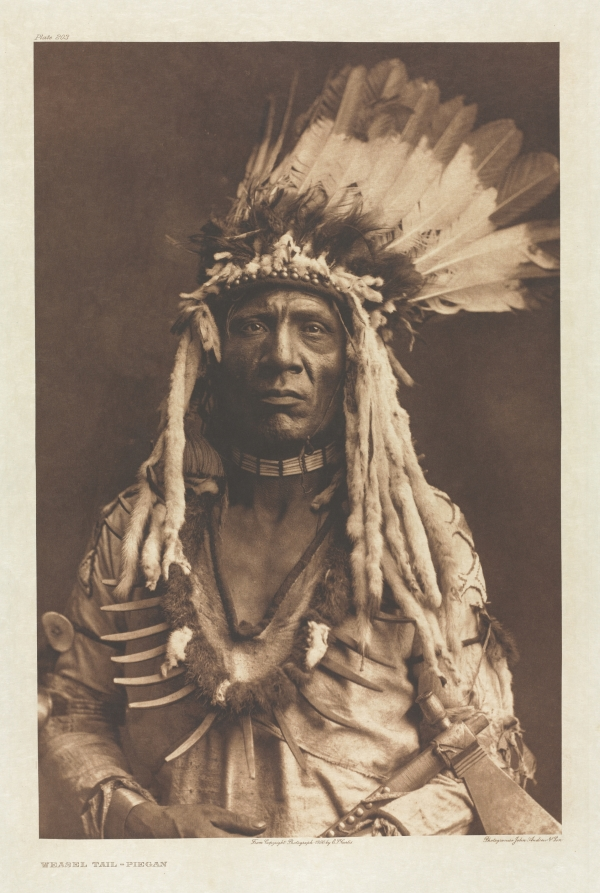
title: Portfolio VI, Plate 203: Weasel Tail - Piegan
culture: America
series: The North American Indian: being a series of Portfolios picturing and describing the Indians of the United States, the Dominion of Canada, and Alaska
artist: Edward S. Curtis (American, 1868–1952)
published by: The University Press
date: 1900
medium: photogravure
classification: Portfolio